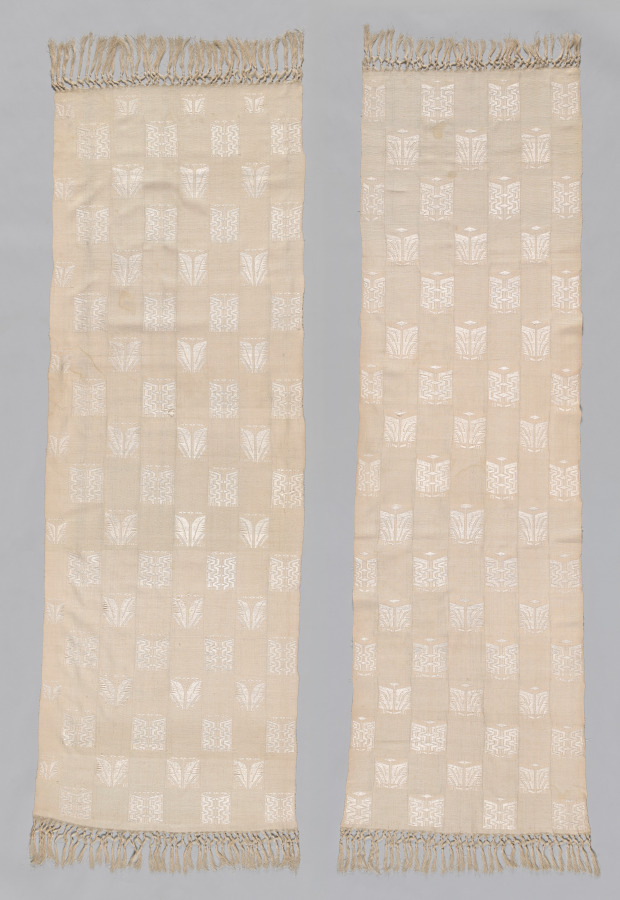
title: Pair of shawls (Lamba Landy Fotsy)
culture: Africa, East Africa, Madagascar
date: 1900s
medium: Silk (Bombyx mori and Borocera cajani)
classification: Textile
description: A lamba is an untailored textile worn by all ages, classes, and genders across much of Madagascar. This is an example of a woman’s garment made after Queen Ranavalona II made Christianity the state religion of the Merina Kingdom. Soon after, all-white lamba became popular for both Sunday church and daily wear. Fotsy is white in the Malagasy language. Indicating its owner’s worldliness, the white-on-white patterns alluded to fashionable imported textiles with damask patterns.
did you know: Invented in the mid-1800s, shawls like this were popular until about 2000.